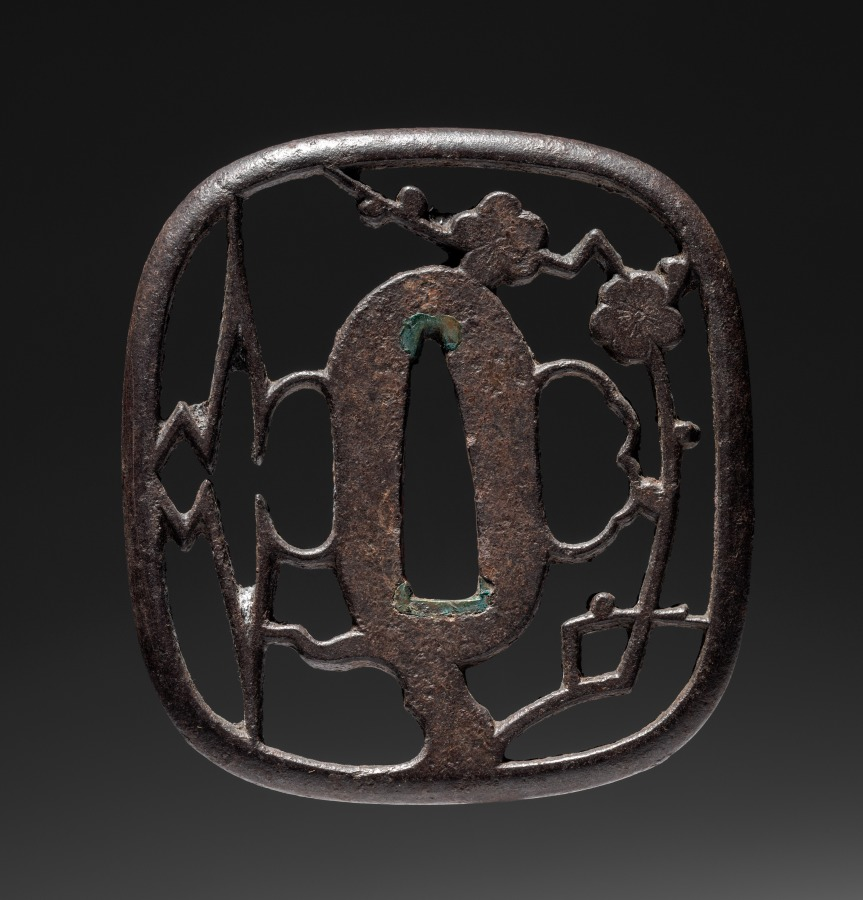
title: Sword Guard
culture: Japan, Edo period (1615–1868)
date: 1615–1868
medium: iron (Akasaka type)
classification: Arms and Armor